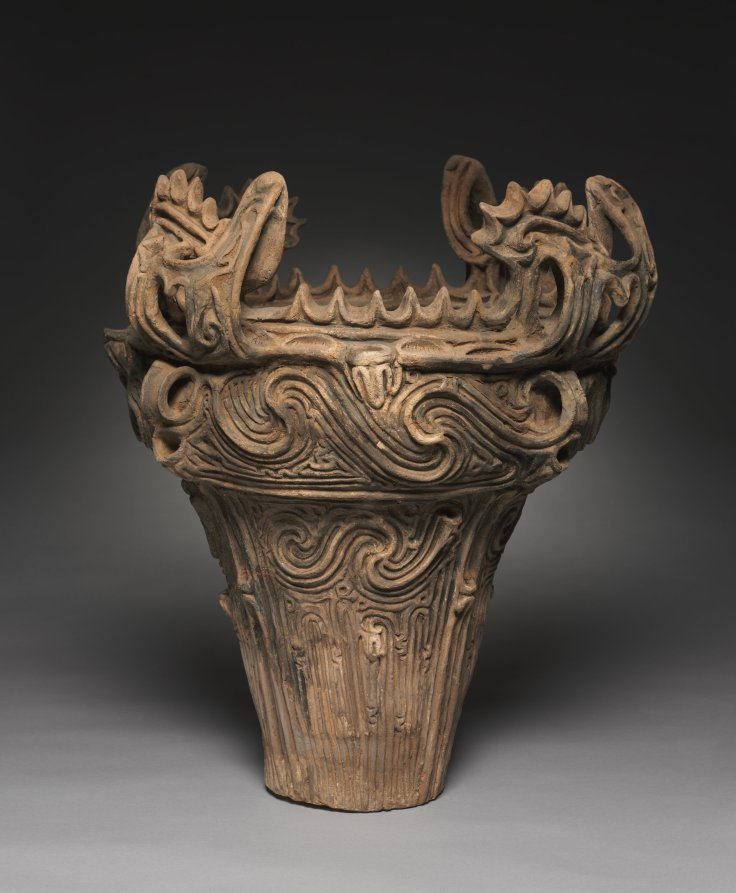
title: Fire-flame Cooking Vessel (Ka'en Doki)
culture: Japan, Jōmon period (c. 10,500–300 BCE)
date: c. 2500 BCE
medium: Earthenware with carved and applied decoration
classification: Ceramic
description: Archaeologists call this kind of vessel “fire flame,” ka’en in Japanese, because its top resembles flames. No one knows why the design was made or what it actually represents. This example is remarkable for the amount that is original. It was recently determined that a bottom from a different vessel was used during its reconstruction in the 1900s, creating a false impression of its intended scale; it would have initially been about four inches shorter. Since their lower portions were set into holes in the ground during use, bases of pots like this one often deteriorate and may be missing when they are excavated.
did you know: Scientifically tested residues from Jōmon vessels reveal that their makers consumed detoxified acorns.